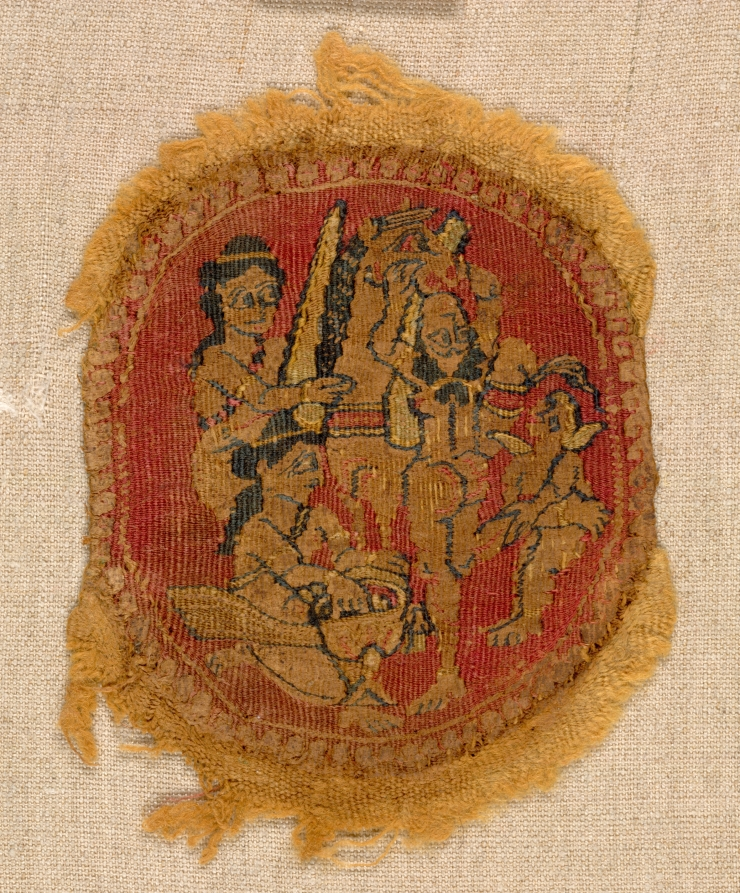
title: Five Round Segmenta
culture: Egypt, Umayyad period (661–750)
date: 650 – 750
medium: tapestry weave: wool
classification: Textile